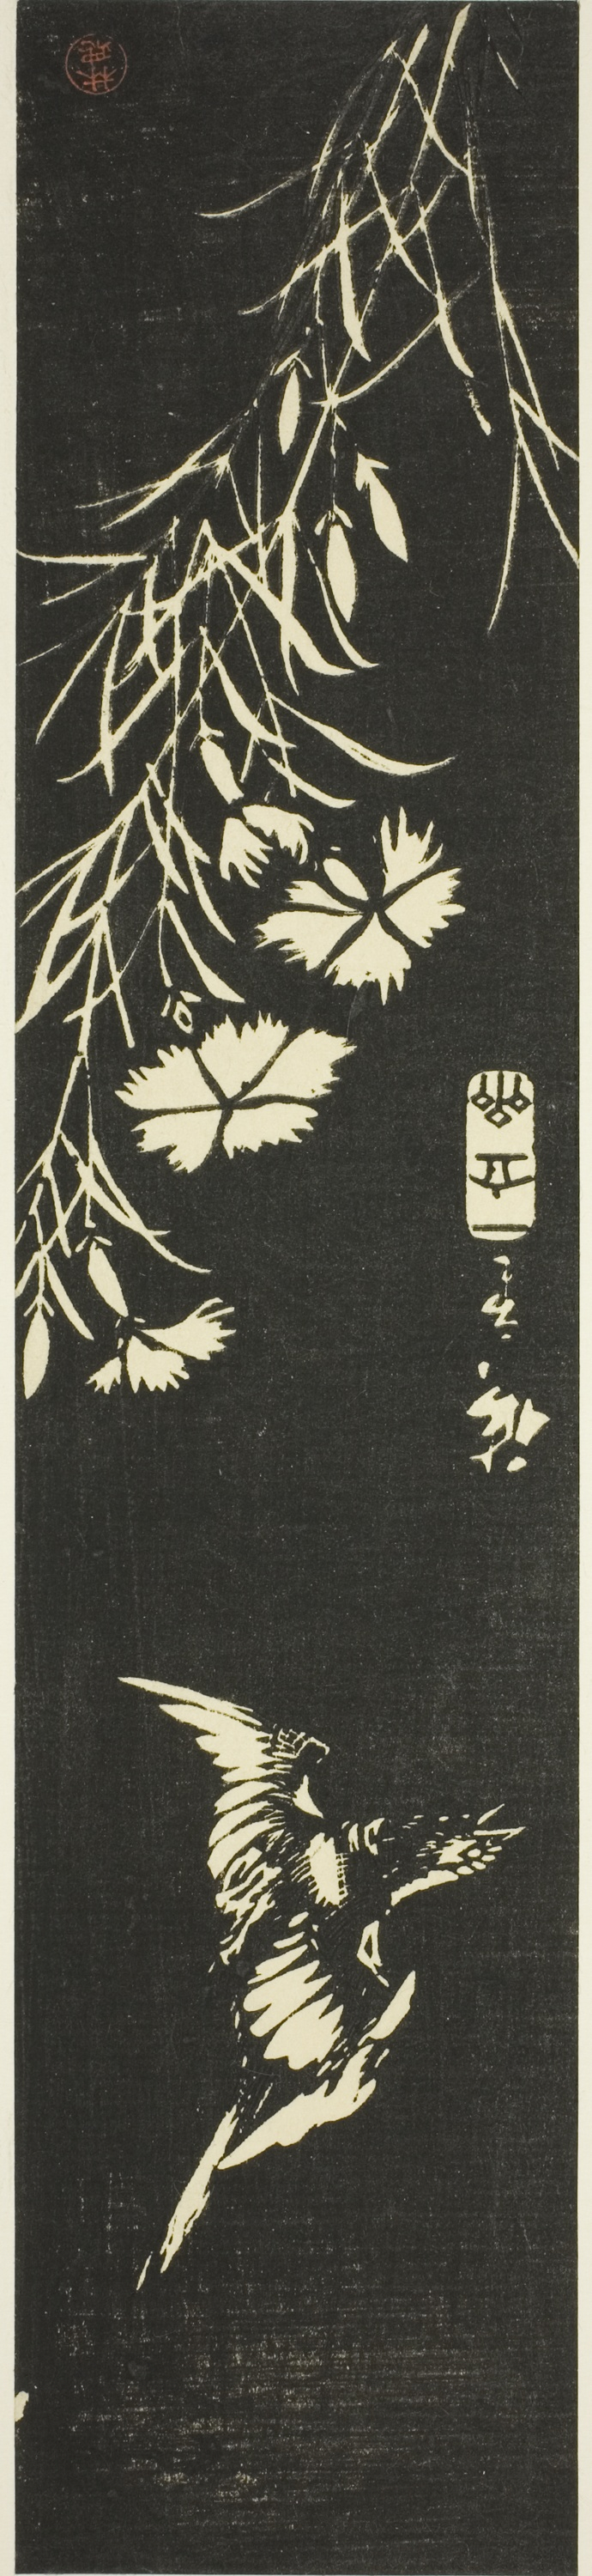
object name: Print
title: Cuckoo and pinks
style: Japanese (culture or style)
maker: Utagawa Hiroshige 歌川 広重; Japanese, 1797-1858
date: c. 1843/46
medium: Woodblock print; section of harimaze sheet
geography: Japan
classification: woodblock print; print; asian art; woodblock